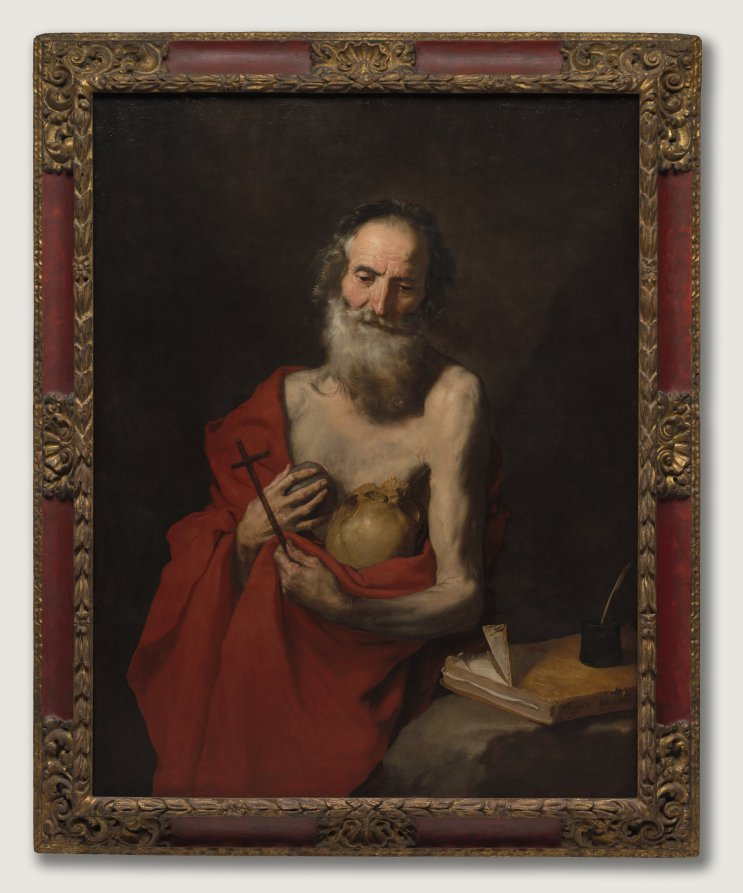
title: Saint Jerome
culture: Spain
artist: Jusepe de Ribera (Spanish, 1591–1652)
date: c. 1638–40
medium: oil on canvas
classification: Painting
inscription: Signed lower right: "Jusepe de Ribera espa[ñol]. F."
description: Saint Jerome (about ad 347–420) translated biblical texts into Latin. Although he sometimes appears as a scholar in his study, Ribera represents him here as a penitent who withdrew to the desert, beating his chest with a stone to emulate Christ’s suffering and contemplating a skull symbolizing human vanity. Working in Naples, Ribera enthusiastically adapted Caravaggio’s characteristic use of light and dark and naturalistic models.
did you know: Ribera signed the painting on the spine of the book in which Jerome will write.